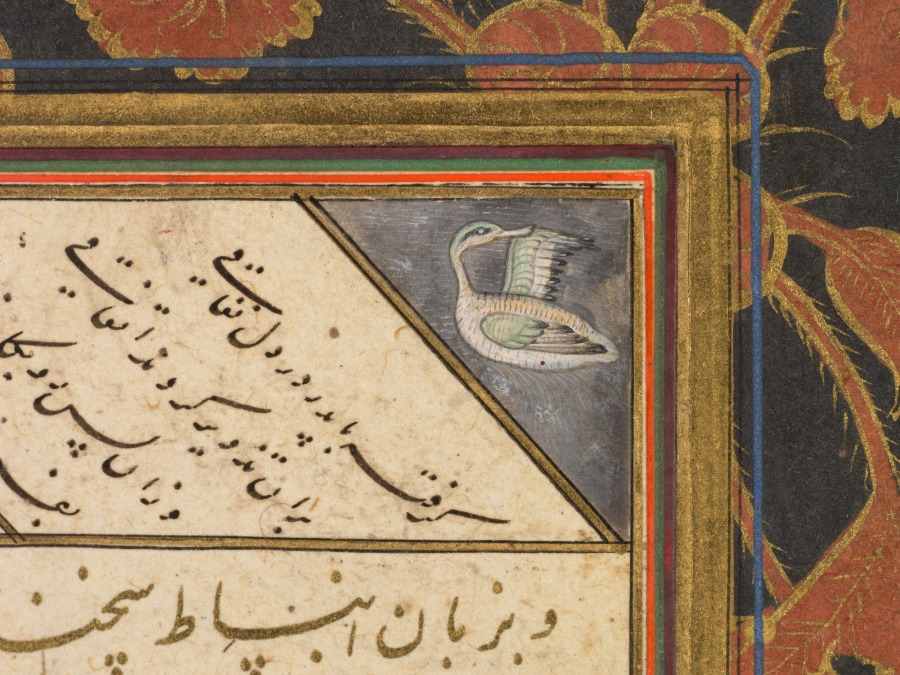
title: Folio B: Folio from the "Five Treasures" (Panj Ganj) of Jami (recto)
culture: Northern India, Mughal, early 17th century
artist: Mushfiq (Indian, active early 1600s)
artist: and others (Indian)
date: 1520–1607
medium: Gum tempera, ink, and gold on paper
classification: Painting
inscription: The miniature signed at upper left: ' amal - i Mushfiq sana 1015 (the work of the Mushfiq year 1015) Text on verso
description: This page contains two different texts, one written diagonally in the border and the other in the two central columns. The section of poetry in the border describes an episode from Joseph’s childhood in which his older brothers suggest to Jacob, their father, that they take Joseph into the countryside so that the boy can learn the area, although they actually plan to kill him. The poem in the central columns advises the reader to smile often, as a smile is sweeter and more pleasing than sugar.